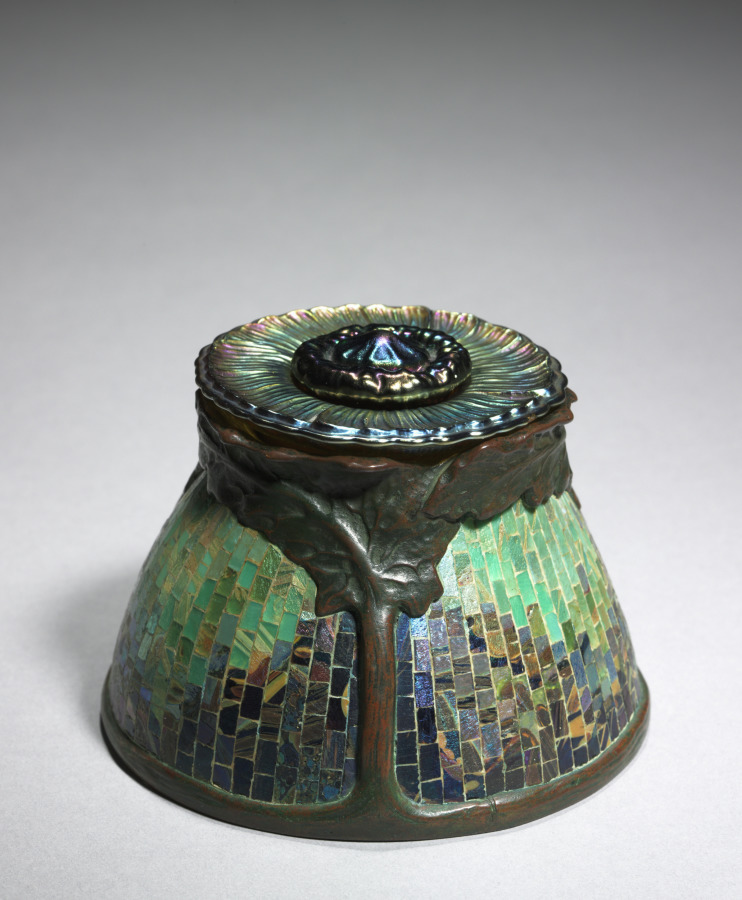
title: Poppy Inkwell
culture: America, New York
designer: attributed to Clara Wolcott Driscoll (American, 1861–1944)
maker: Tiffany Glass & Decorating Company (America, New York, 1892–1902)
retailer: Tiffany Studios (United States, New York, 1902–32)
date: c. 1898–1906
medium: favrile glass mosaic, bronze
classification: Glass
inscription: stamped on underside: 28289/Tiffany Studios/New York/TGDCo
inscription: engraved on underside of insert: L.C.T. Favrile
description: By 1900 Louis Comfort Tiffany had expanded his empire by increasing the firm’s production of “fancy goods,” including inkstands, candlesticks, clocks, small boxes, desk sets, tea screens, and other functional objects. Along with the array of artistic glass designs from his factory in Corona, Queens, works in ceramic, bronze, other metals, and even jewelry abounded. These smaller, more affordable luxury items were designed with as much thought to artistry as the great stained glass windows and lamps through which the firm enjoyed unrivaled success.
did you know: More than a thousand tiny pieces of glass form the mosaic design of this inkwell.